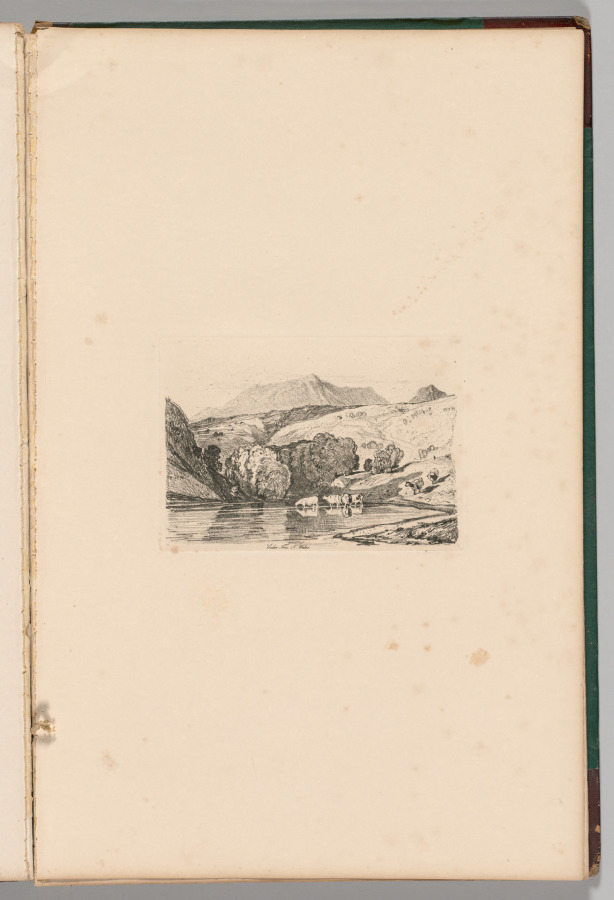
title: Liber Studiorum: Plate 15, Cader Iris, North Wales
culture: England, 19th century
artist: John Sell Cotman (British, 1782–1842)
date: 1838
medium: softground etching, from a bound volume containing 48 plates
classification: Bound Volume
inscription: In plate, within image, upper right: 15; in plate, below image: Cader Iris, N. Wales